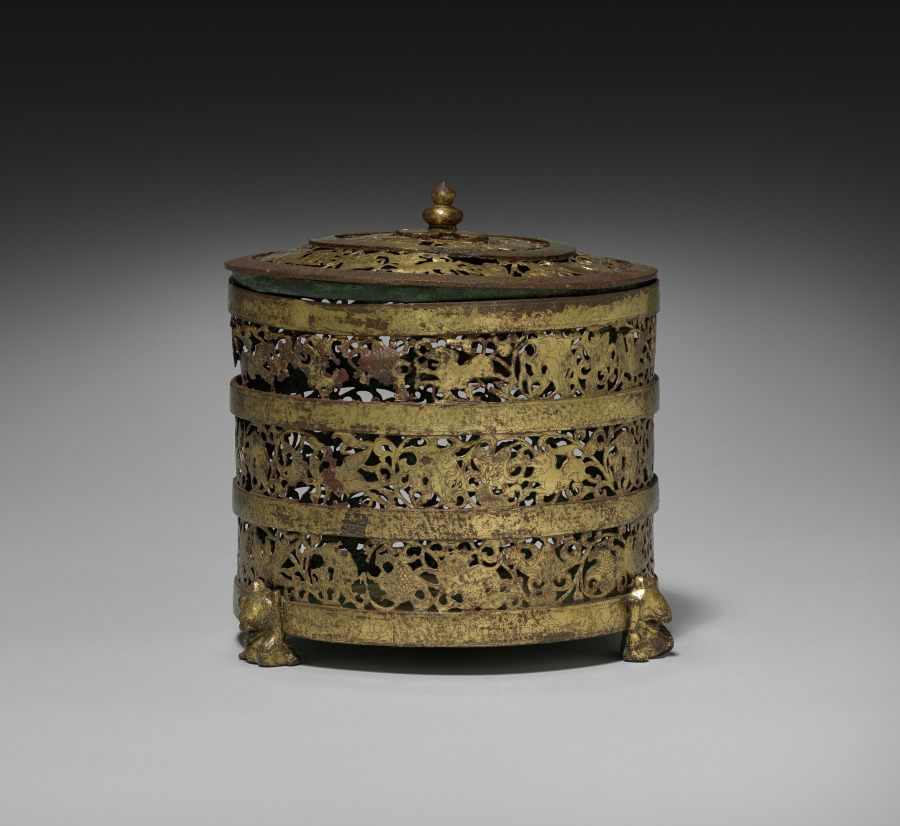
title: Cylindrical Container with Cover (Lian)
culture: China, Han dynasty (202 BCE–220 CE)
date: 100 BCE–100 CE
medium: gilt bronze with openwork and chased designs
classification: Metalwork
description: This magnificent gilded bronze vessel with openwork decoration shows all kinds of fabulous creatures, real and imaginary, chasing each other among swirling scrolls. There is an emphasis on the unbroken rhythms of movement, rather than the ferocity of animals in combat. Cylindrical bronze vessels in this shape, called lian, were often used as cosmetic boxes.